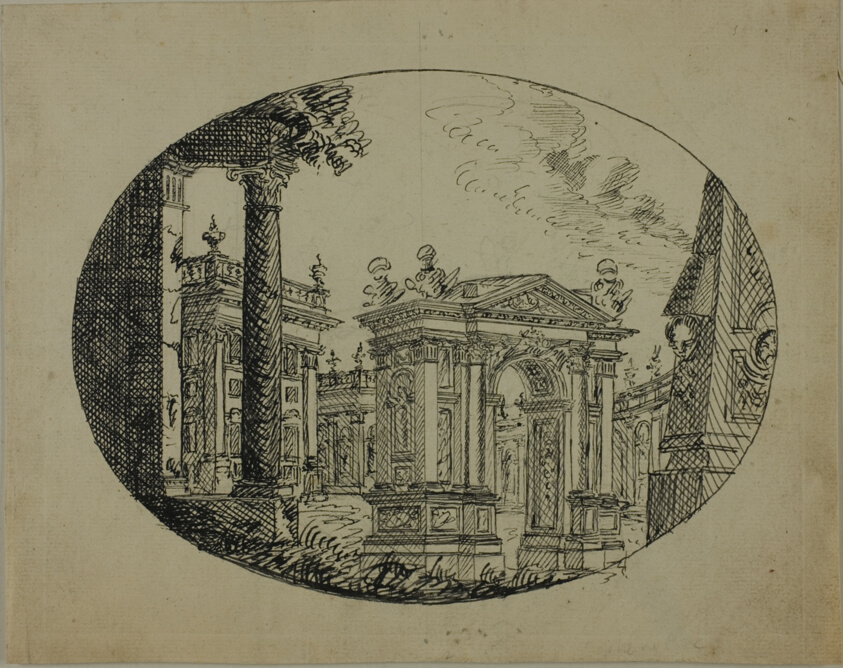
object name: Drawing and Watercolor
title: Roman Edifices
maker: Unknown artist (Italian, 18th century)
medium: Pen and black ink over graphite, on cream laid paper, laid down on ivory laid paper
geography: Italy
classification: pen and ink drawings; drawings (visual works); prints and drawing